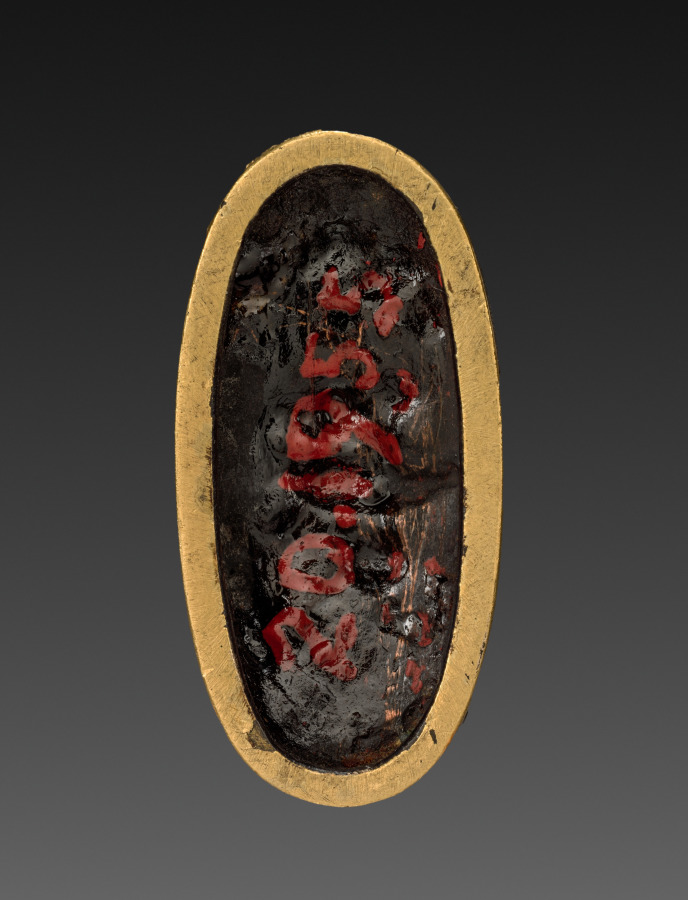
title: Sword-Hilt Pommel (Kashira)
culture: Japan, Edo period (1615–1868)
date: 1700–1850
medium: shakudo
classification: Arms and Armor